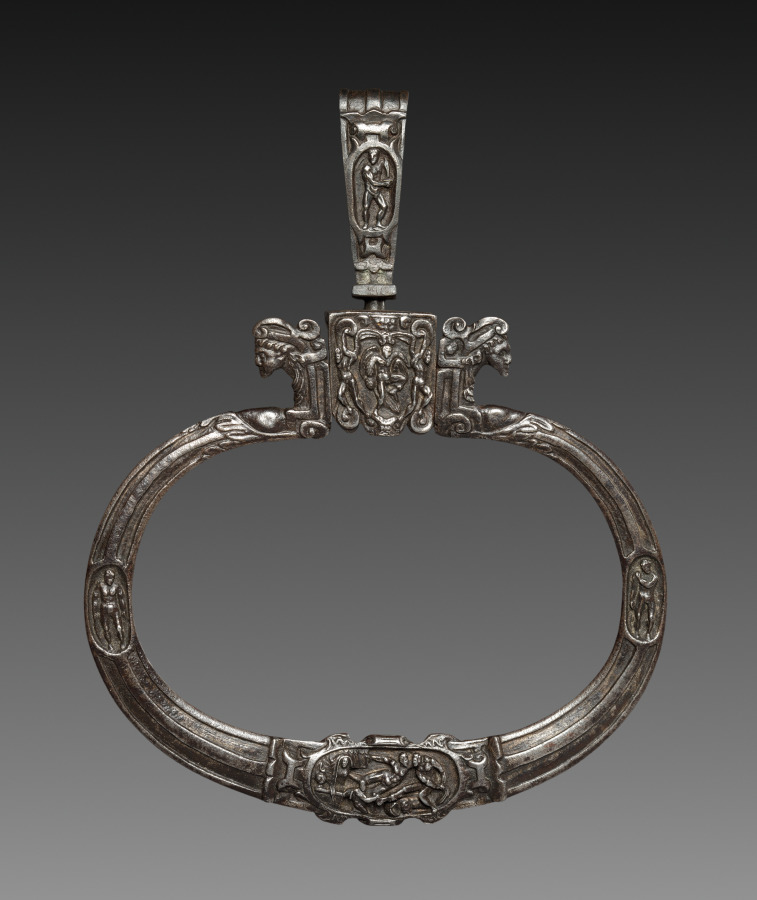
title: Purse Strap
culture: Italy, 16th century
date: 1500s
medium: chiseled steel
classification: Metalwork